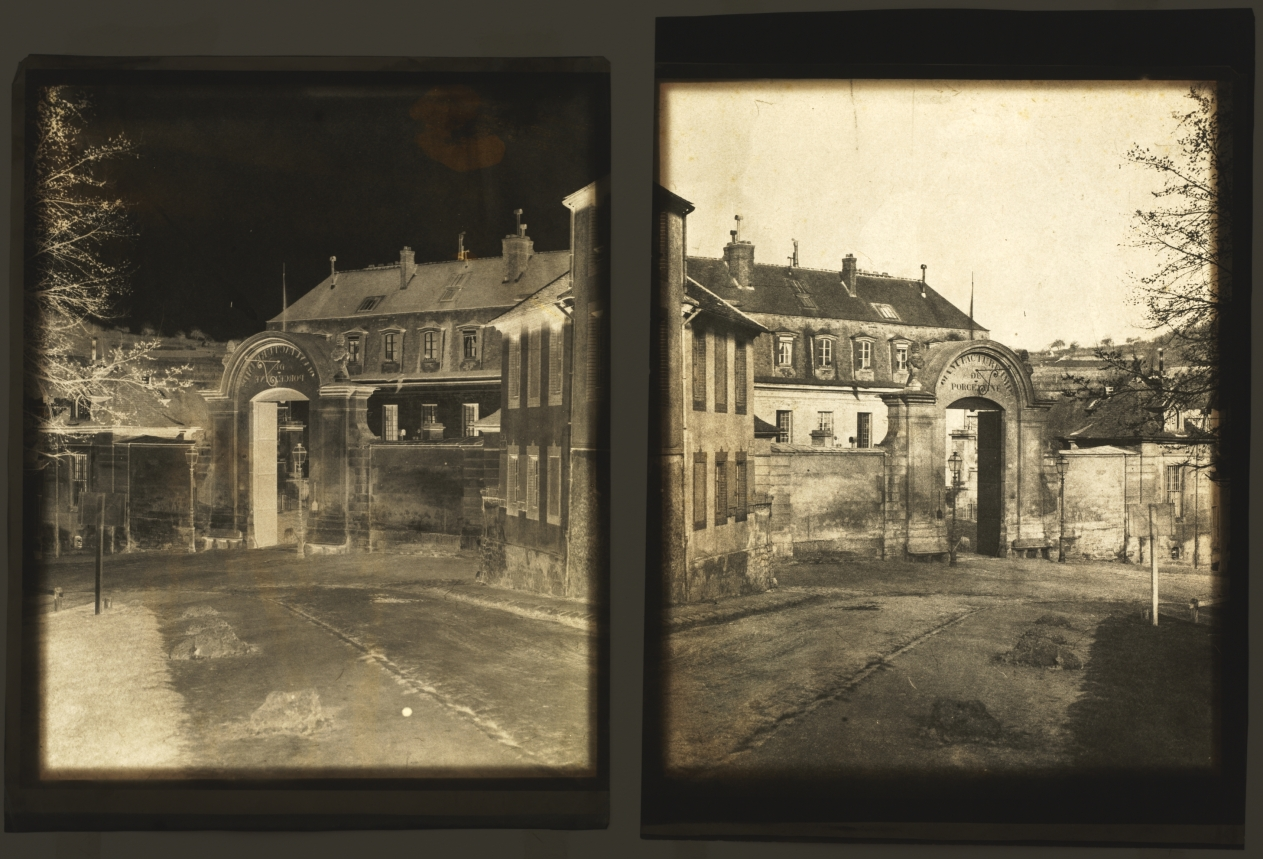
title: Doorway to Sèvres Factory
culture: France, Sèvres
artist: Louis-Rémy Robert (French, 1811–1882)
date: c. 1852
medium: salted paper print, waxed, from waxed paper negative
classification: Photograph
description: Originally trained by his father as a painter on glass and porcelain, Louis-Rémy Robert was taught photography by Henri-Victor Regnault, a close associate and director of the Sèvres porcelain factory. Particularly known for landscape and architectural views, Robert depicted here the gateway to the Sèvres factory, where he was head of the painting and gilding studio from 1848–1871. He then became director of the factory for eight years. In this scene, the artist not only provided a sense of place, but also transformed a complex composition into a unified, compelling assemblage of shapes, textures, and tonalities. The print is shown with its original waxed paper negative—an unusual occurrence since early negatives have rarely survived the passage of time.